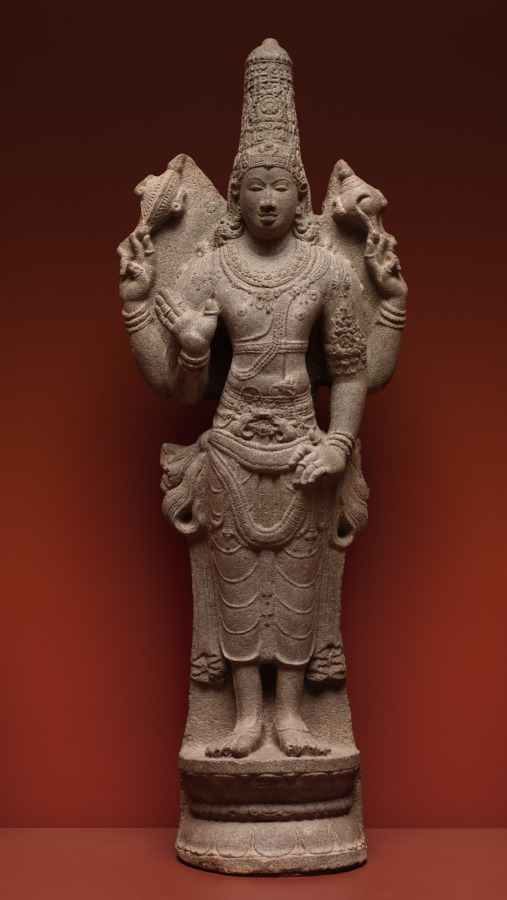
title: Vishnu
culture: South India, Tamil Nadu, probably Pudokkatai, early Chola Dynasty, 10th Century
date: 900–950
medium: granite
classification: Sculpture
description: Vishnu is shown here in his form as supreme lord, his high crown indicative of his royal aspect; his four arms reveal his superhuman nature. His upper right hand holds a discus, seen from the side. In his upper left hand he holds the conch shell.